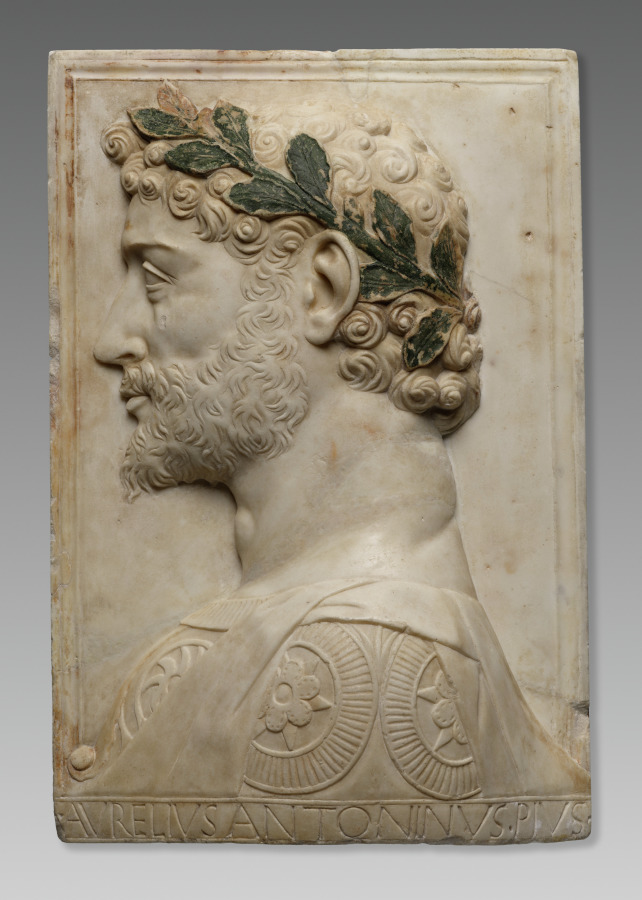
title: Aurelius Antoninus Pius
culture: Italy, Lombard School, late 15th century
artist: Gregorio di Lorenzo (Italian, c. 1436–1504)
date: late 1400s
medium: marble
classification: Sculpture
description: A laurel wreath rests on this Roman emperor’s finely articulated corkscrew curls, underscoring his military triumphs. While many ancient and classically inspired marble sculptures were painted, the survival of pigments is rare. In addition to the vibrant green coloring, traces of gold also remain on the leaves.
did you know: The artist can be identified by his distinctive flame-shaped curls forming the beard.